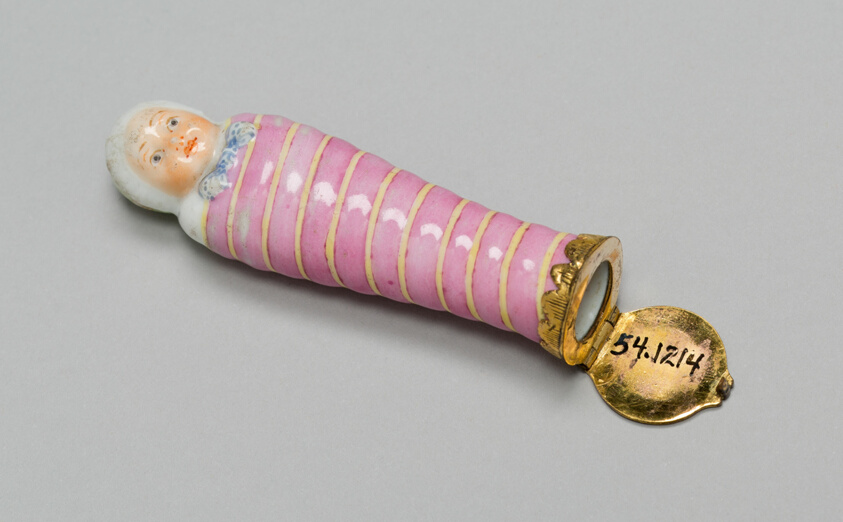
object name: Metalwork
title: Scent Bottle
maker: Berlin, Germany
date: Late 18th century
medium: Hard-paste porcelain, polychrome enamels, and gold mounts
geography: Germany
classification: porcelain; ceramics; european decorative arts; metalwork